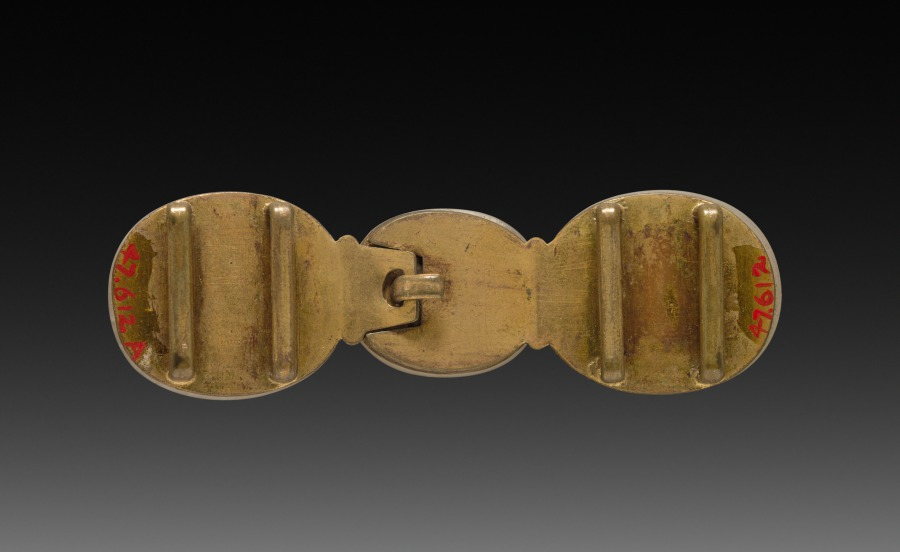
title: Buckle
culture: China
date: 1900s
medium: brass with veneer of white jade, set with three stones of jade and quartz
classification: Jewelry